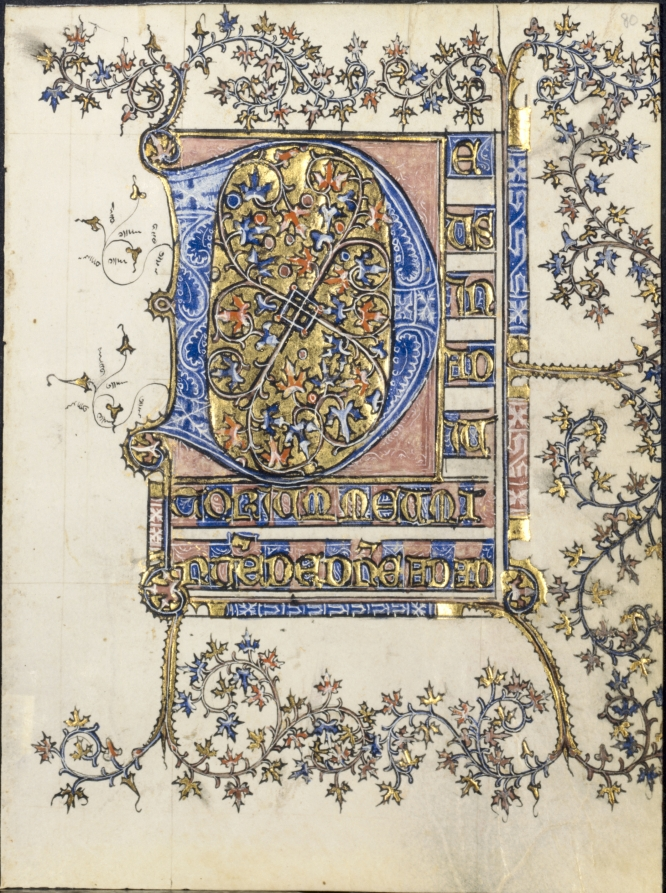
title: Leaf from a Book of Hours: Initial D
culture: France, probably Soissons, 15th century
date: c. 1400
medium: ink, tempera and gold on vellum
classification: Manuscript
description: This leaf presents an extravagant visual feast that is both colorful and delicate. The parent codex to which this leaf belonged, still intact as recently as 1983, was made for use in the Diocese of Soissons. The manuscript listed Saint Medard of Soissons in its litany, which suggests that Soissons was also the city where the manuscript was made. A prayer to Saint Anne written in an Italian hand is also in the manuscript, and may indicate that it was taken to Italy during the 1400s.